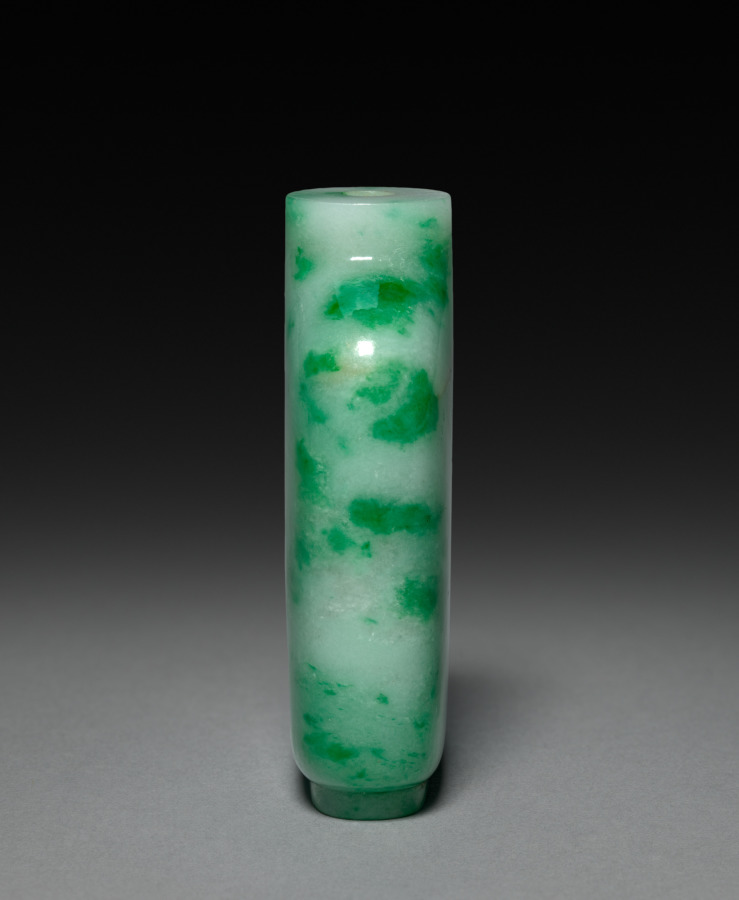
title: Snuff Bottle with Stopper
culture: China, Qing dynasty (1644-1911)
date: 1800s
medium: jade and rose quartz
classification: Jade